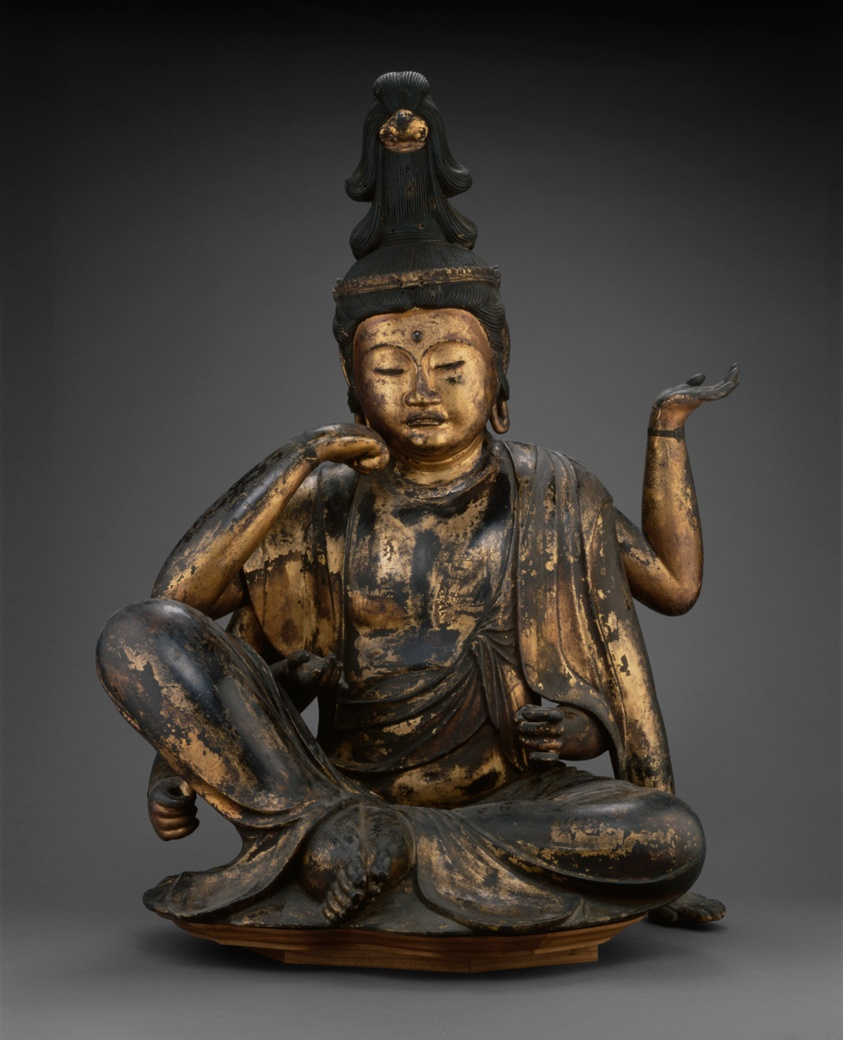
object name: Sculpture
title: Nyoirin Kannon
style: Japanese (culture or style)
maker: Artist unknown; Japanese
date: Kamakura period, c. 1250/1330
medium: Wood with lacquer and gilding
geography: Japan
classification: wood; sculpture; asian art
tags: Buddhism, religion